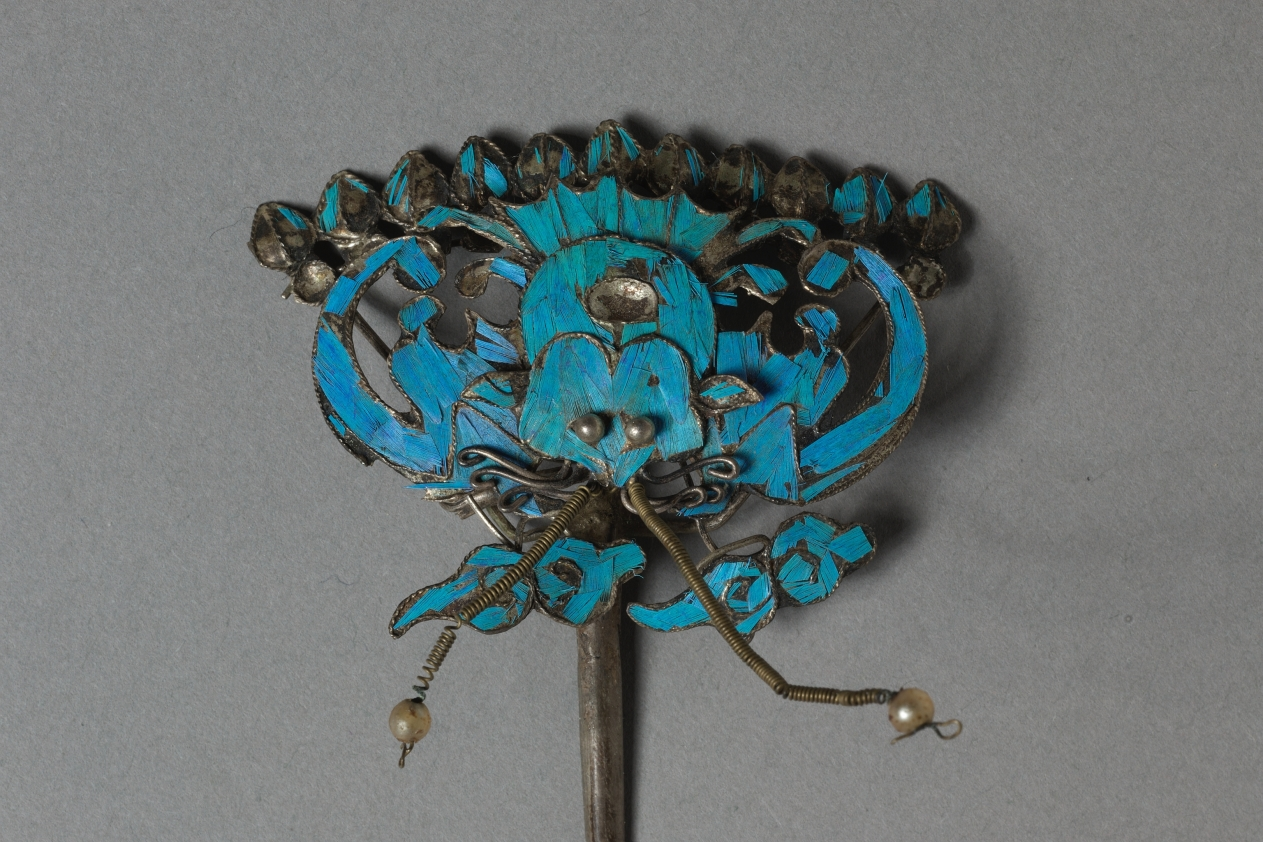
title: Headdress Ornament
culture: China, Qing dynasty (1644-1911)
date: 1700s or 1800s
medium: Copper-silver alloy, gilding, kingfisher feathers, glass beads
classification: Jewelry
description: Hair ornaments depicting flowers, butterflies, or birds were worn by ladies of the Manchu elite class.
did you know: The iridescent blue feathers of kingfisher birds are inlaid in hairpins and headdresses.